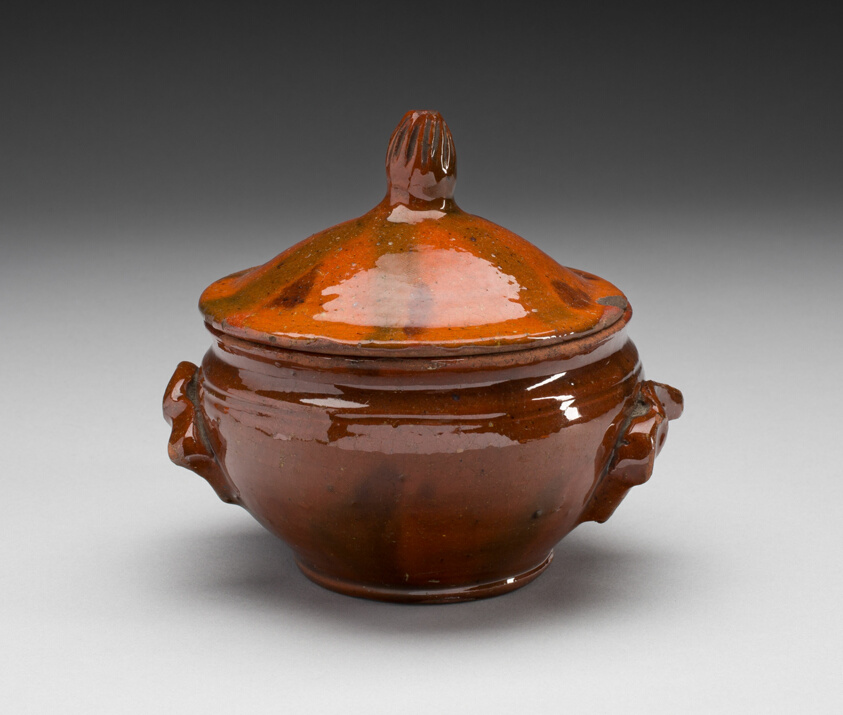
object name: Decorative Arts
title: Sugar bowl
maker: Artist unknown (American, 19th century); Probably Pennsylvania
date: 1820–50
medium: Earthenware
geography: Pennsylvania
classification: sugar bowl; american decorative arts; ceramics; decorative arts